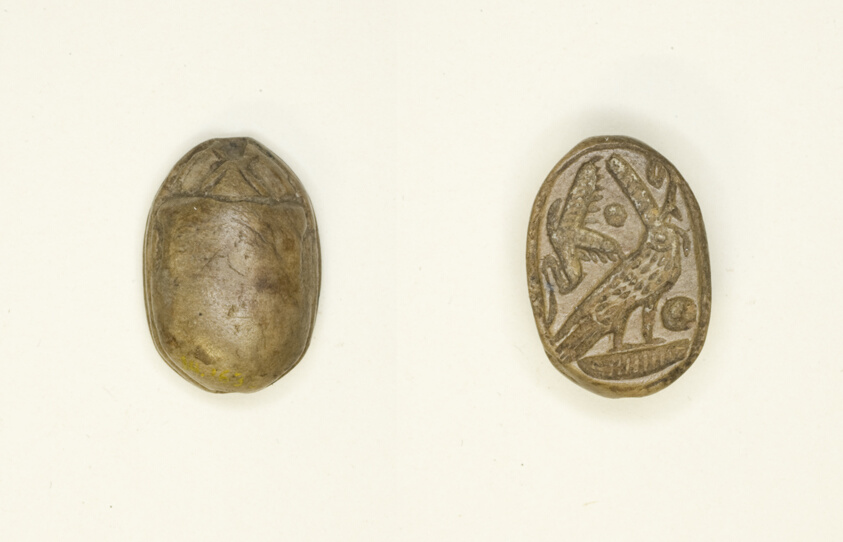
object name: Costume and Accessories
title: Scarab: Falcon Deity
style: egyptian, ancient, new kingdom, third intermediate period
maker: Egyptian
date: New Kingdom–Third Intermediate Period, Dynasties 19–21 (about 1186–945 BCE)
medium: Steatite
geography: Egypt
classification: scarab; ancient art; costume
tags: gods (deities), deities, falcons, Hieroglyphs, insects, serpents, snakes, suns